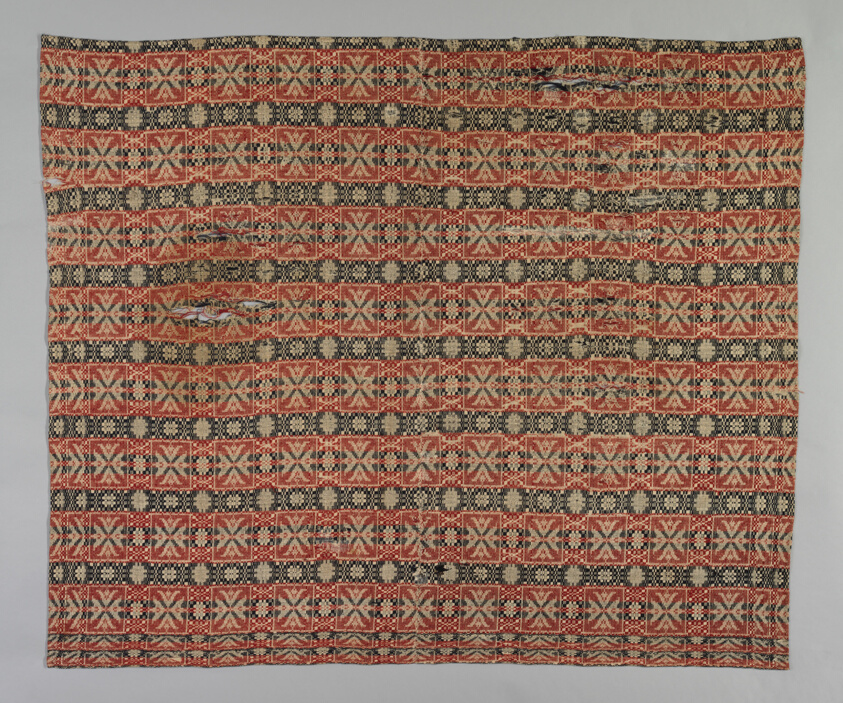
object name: Textile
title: Coverlet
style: American Fancy, Star work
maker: United States, Probably Pennsylvania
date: 1820-40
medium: Cotton and wool, plain weave with supplementary wefts in composite point twill weave (multiple shaft, 4 tie-down); two loom widths joined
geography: Pennsylvania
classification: weaving - coverlet; coverlet; weaving; textile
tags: coverlet, geometric motif, grids, floral motifs, squares, star work